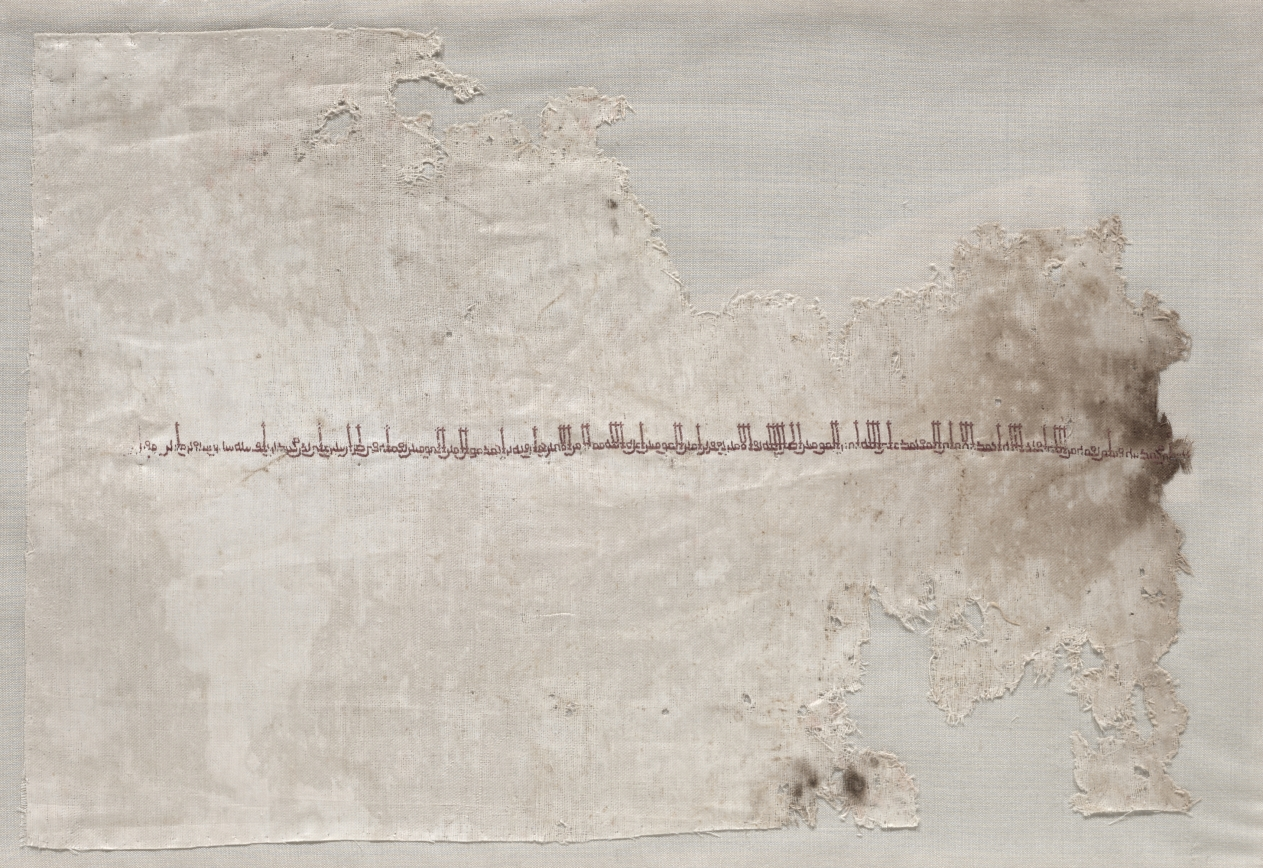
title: Embroidered tiraz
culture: Egypt, Tinnis, Tulunid period, Emir Khumarawayh b. Ahmad under Caliph al’Mu’tamid, dated 889–90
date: 889–890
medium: plain weave with embroidery: linen and silk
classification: Embroidery